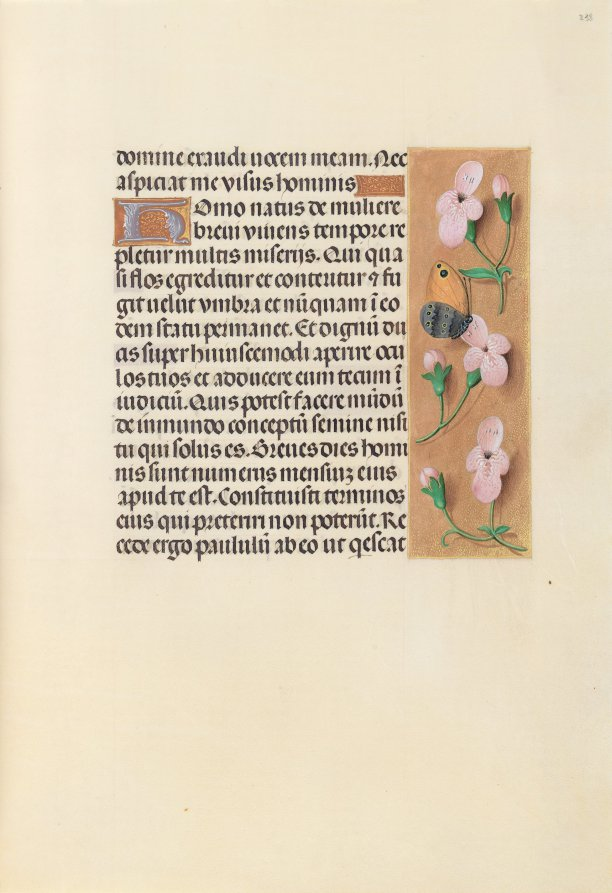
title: Hours of Queen Isabella the Catholic, Queen of Spain: Fol. 238r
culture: Flanders, Ghent and Bruges, late 15th century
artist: Master of the First Prayerbook of Maximillian (Flemish, c. 1444–1519)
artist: and Associates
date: c. 1500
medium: ink, tempera, and gold on vellum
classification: Bound Volume